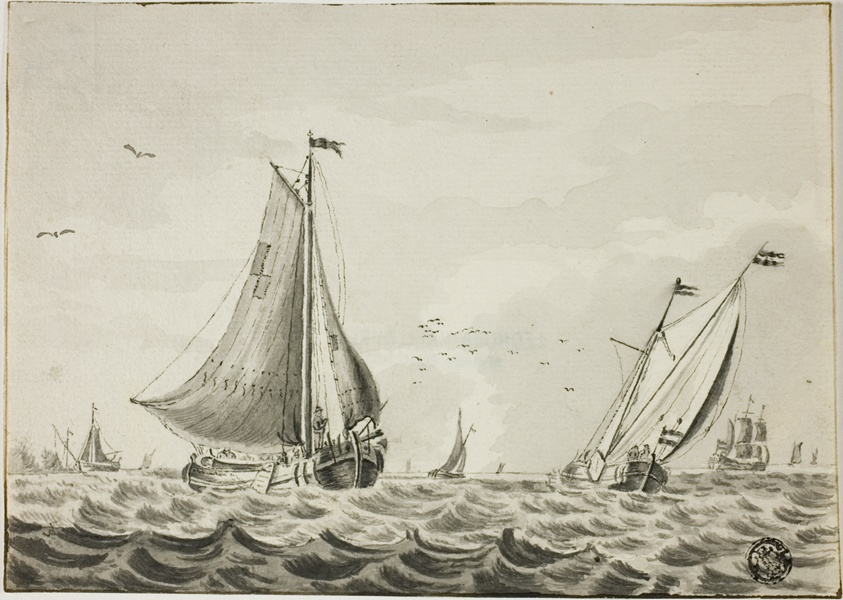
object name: Drawing and Watercolor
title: Sailboats on Sea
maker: Unknown artist (Dutch, 16th century)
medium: Brush and black ink, with brush and gray wash, over traces of graphite, on ivory laid paper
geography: Netherlands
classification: ink or chalk wash; drawings (visual works); prints and drawing